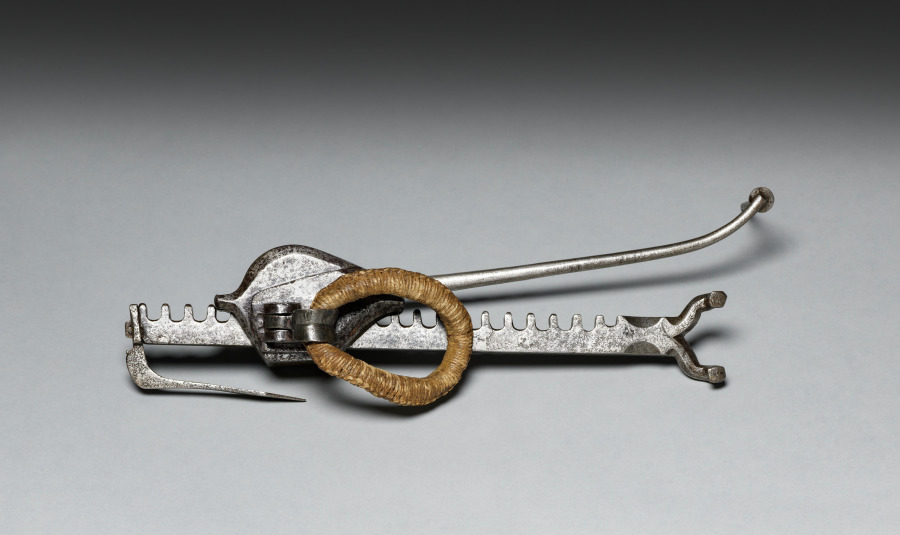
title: Cranequin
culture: France(?)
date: c. 1480–1500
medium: steel and brass; incised decoration; pierced traceried Gothic windows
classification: Arms and Armor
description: Bows made of composite materials were developed during the 1400s. They were immensely powerful and could be spanned only with the aid of a winder called a cranequin like the one seen here.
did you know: The mark, made of inlaid copper, is currently unidentified.